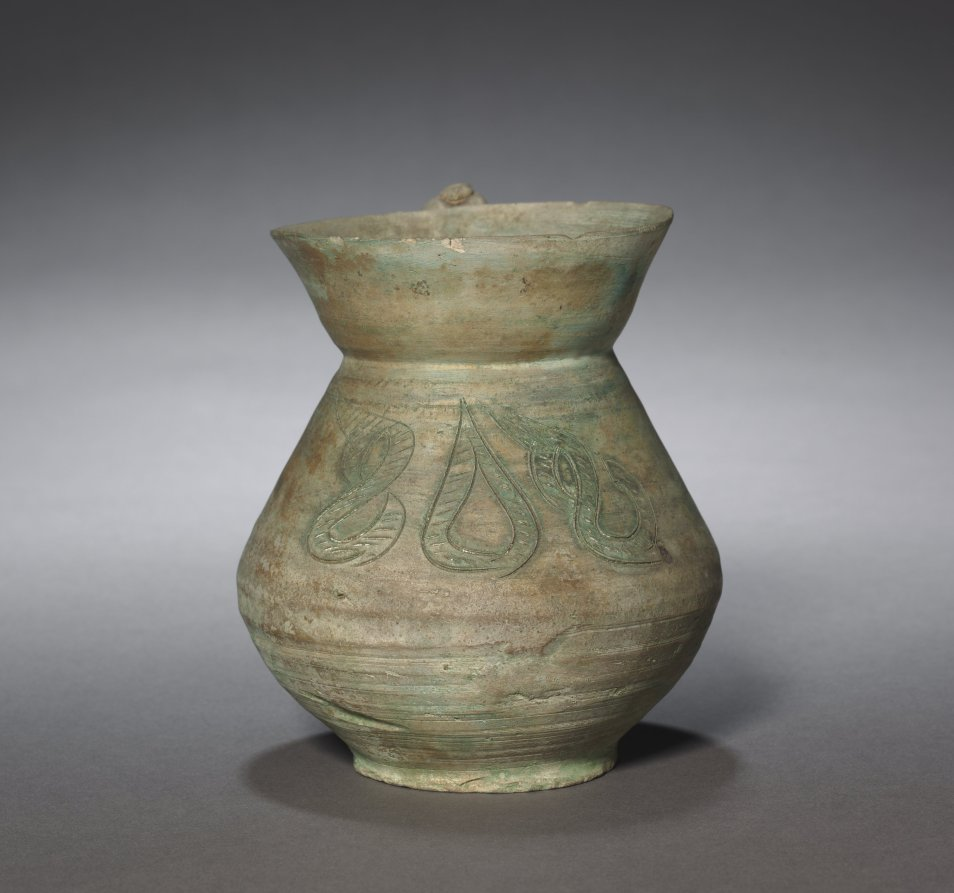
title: Jug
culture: Iran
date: 900s–1100s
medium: earthenware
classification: Ceramic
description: This jug was acquired in 1915, prior to the museum opening.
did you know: The handle has a thumb rest.